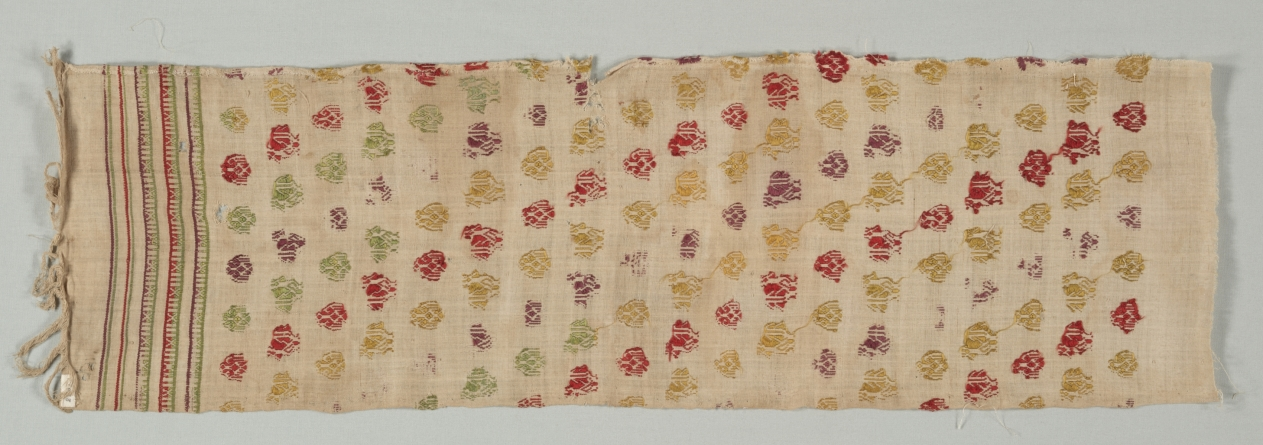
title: Textile Fragment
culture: Turkey, Asia Minor(?)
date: 19th century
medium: silk and linen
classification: Textile